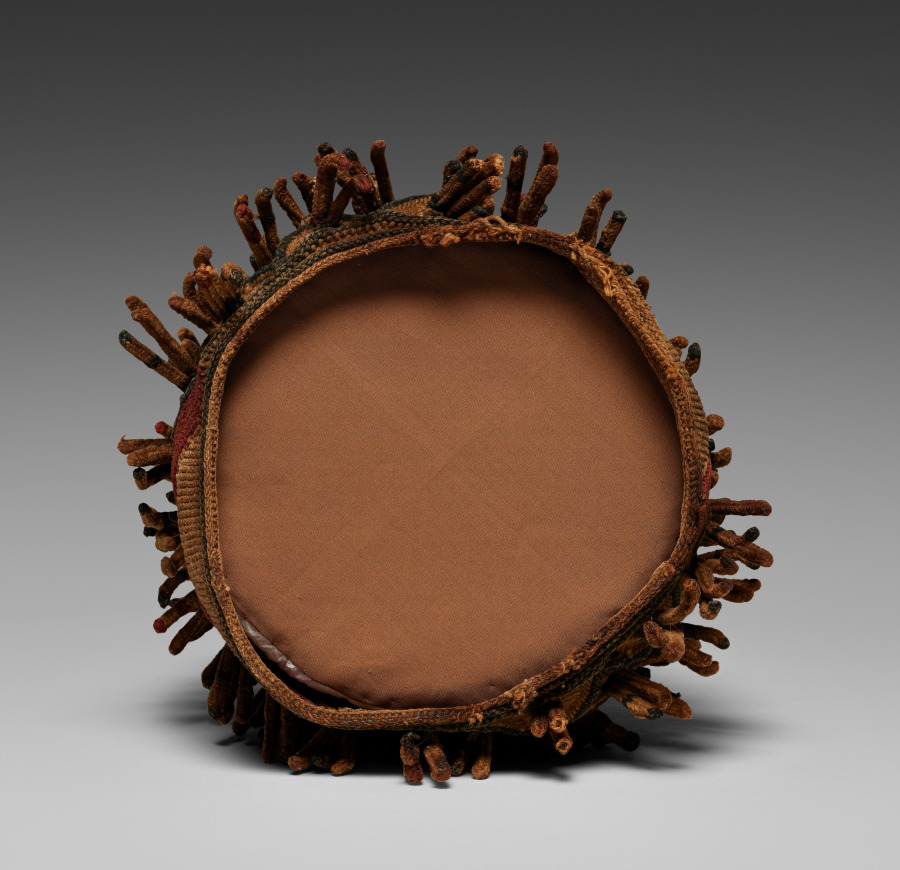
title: Prestige Headdress (Ashetu or shüötu)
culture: Bamum style, unknown maker, Grassfields region, Cameroon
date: 1900–1950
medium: cotton, dye (including indigo)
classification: Textile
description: The bristle-like surface of this man’s prestige headdress is dyed with indigo or a red pigment. Below, a diamond pattern evokes another royal symbol, the leopard. The projections are reinforced with small pieces of wood. Such extensions are seen on prestige headgear represented in wood in sculptures and in colored pencil on drawings in the collection.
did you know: Titled men still wear such prestigious adornment today.